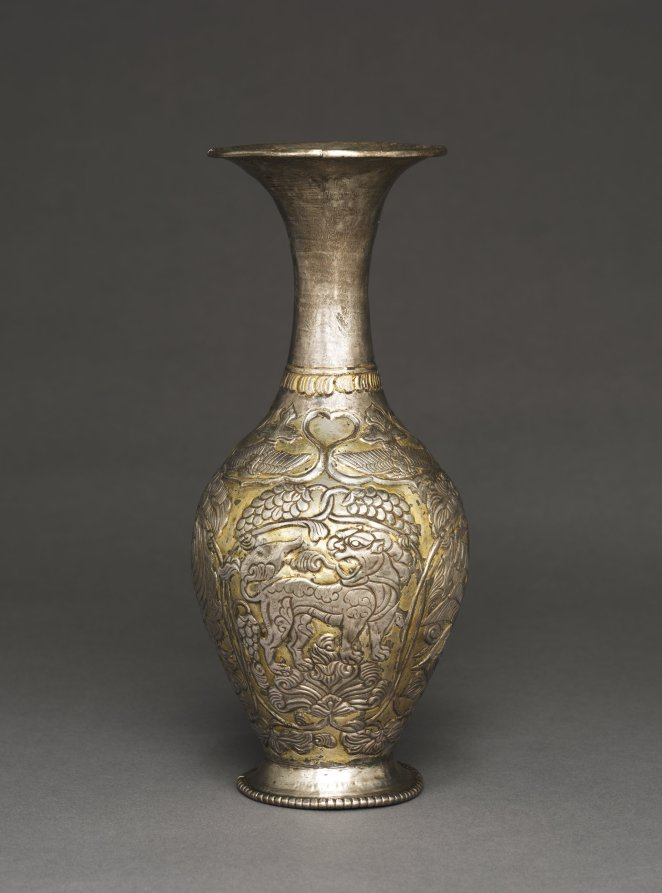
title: Vase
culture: Central Asia (Sogdiana) or Tibet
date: c. late 600s–early 700s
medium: silver with gilded foil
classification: Silver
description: Located amid the vast “silk roads” trade network, medieval Tibet was a place of dynamic cultural exchange. This decanter is evidence of such interactions. The vessel is part of the tableware used to hold wine during feasts. Tibetan elites adopted the tradition of consuming wine at social gatherings from their Iranian (Persian) contemporaries, whose wine banquets were lavish affairs with plentiful food and drink.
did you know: Lions were often seen as powerful protectors while phoenixes were associated with good fortune.